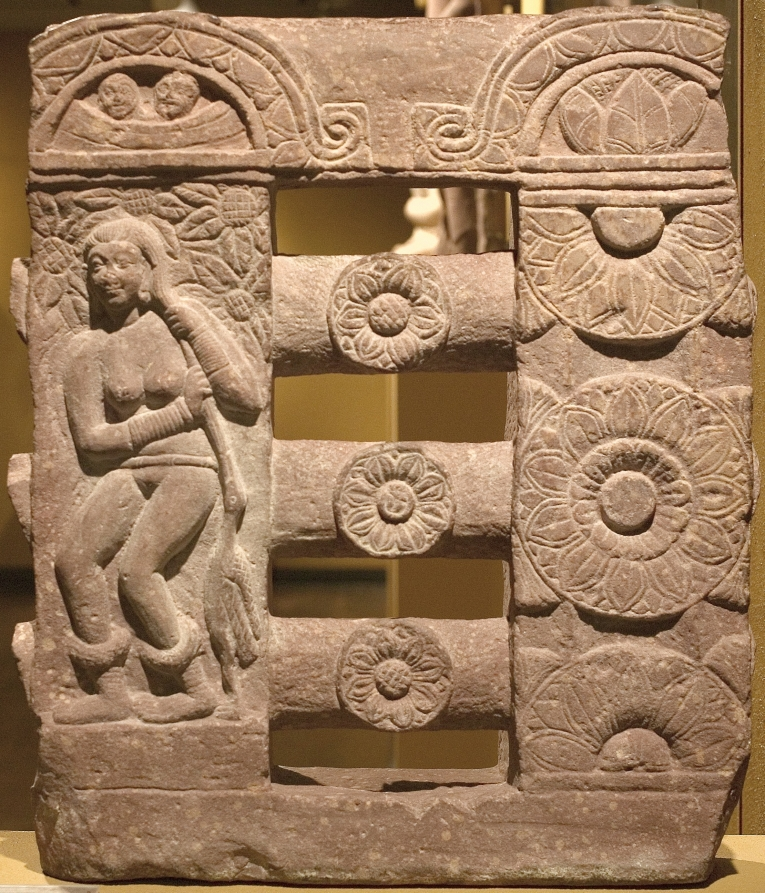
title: Section of Monolithic Railing with Bather and Lotus Medallions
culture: India, Mathura, Kushan period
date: c. 150–250 CE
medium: red sandstone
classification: Sculpture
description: Railings demarcated a sacred space, such as a tree shrine or a stupa. Images associated with purifying waters were carved on the railings, as if to symbolically cleanse those who passed through the gate. Under a fruit-bearing tree is a young woman squeezing water from her hair. In a visual depiction of an ancient Indian poetic trope, a goose mistakes the drops of water for pearls and comes to eat them.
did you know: In the windows above, carved on the coping stone, are two voyeurs and a bowl made of leaves filled with flower garlands, which would be used to adorn the sacred site.